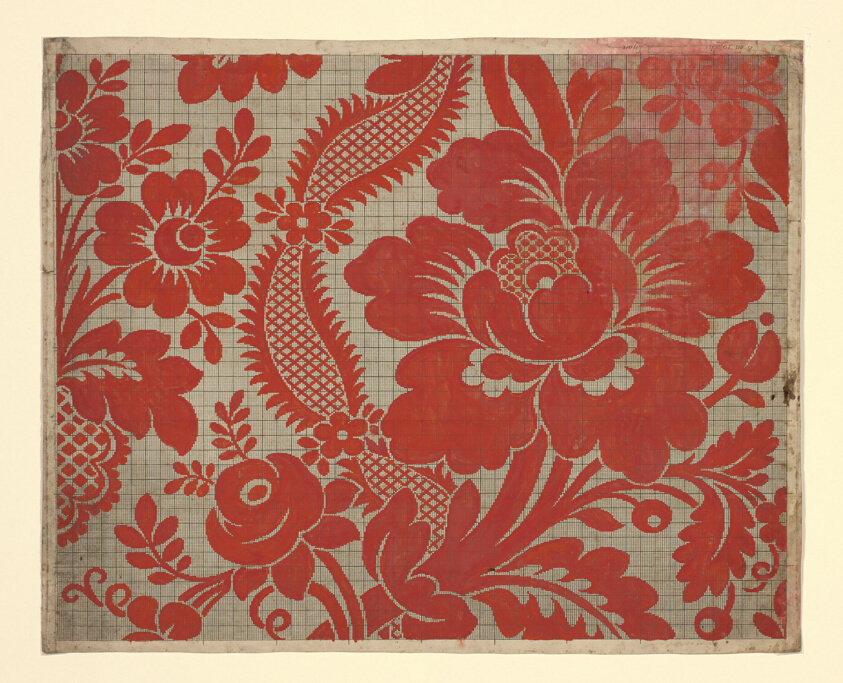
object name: Drawing and Watercolor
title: Mise-en-carte (Point-paper)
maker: France, Lyon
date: 1760/90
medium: Ink and gouache on hand drawn graph paper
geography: France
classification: textile; accessory - paper design